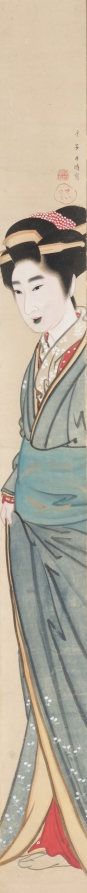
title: Courtesan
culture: Japan, Edo period (1615–1868)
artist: Gion Seitoku (Japanese, active late 1700s–early 1800s)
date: early 1800s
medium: hanging scroll, pillar painting; ink and color paper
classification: Painting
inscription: Artist's signature and two seals upper right side.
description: This narrow hanging scroll, known as a pillar painting, is similar to the format of Shigemasa’s Two Beauties (see CMA 1985.274).